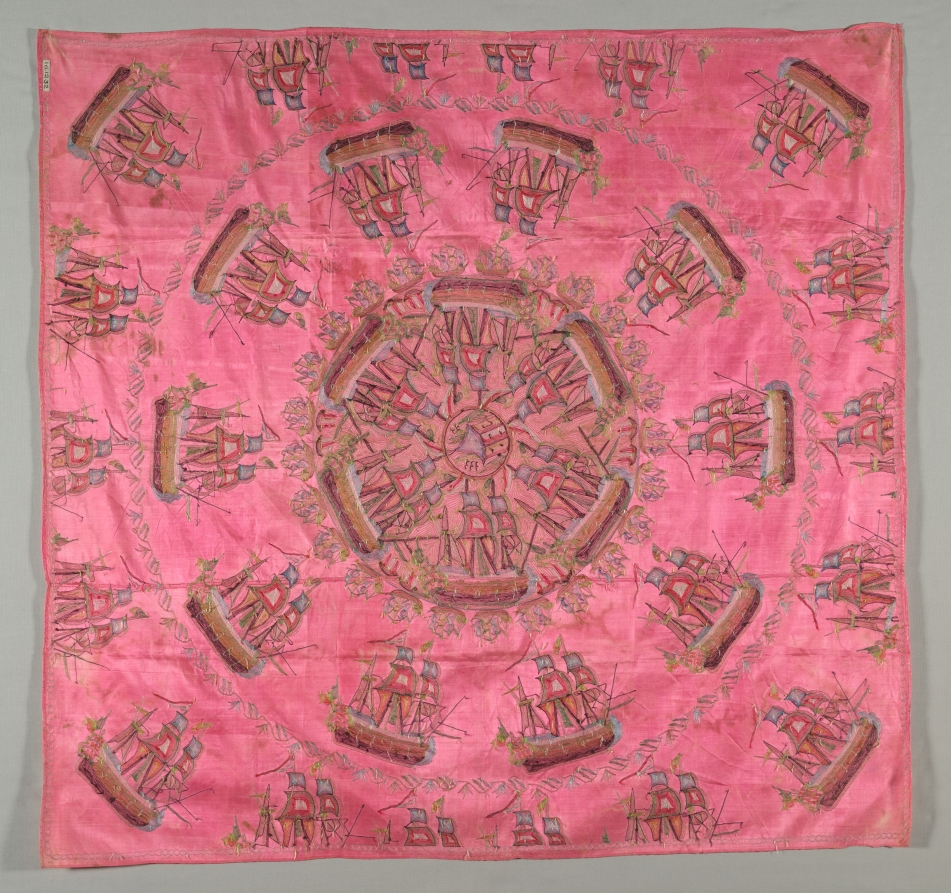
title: Embroidered Square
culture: Turkey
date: 1700s–1800s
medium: embroidery, silk and metallic threads, on silk tabby ground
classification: Embroidery